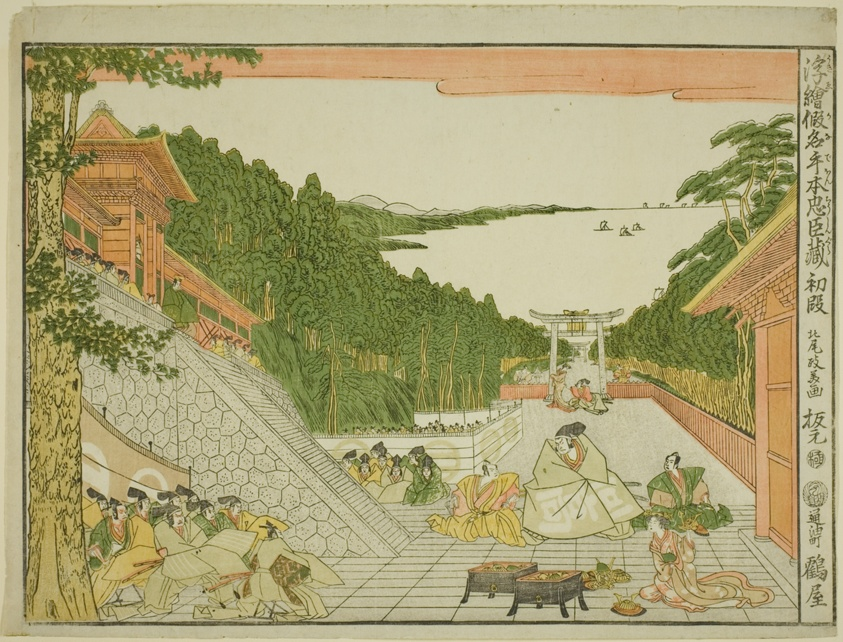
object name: Print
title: Act I (Shodan), from the series Perspective Pictures of the Storehouse of Loyal Retainers, a Primer (Uki-e Kanadahon Chushingura)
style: edo (japanese period)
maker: Kitao Masayoshi (Kuwagata Keisai) (Japanese, 1764–1824)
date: c.1791-94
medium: Woodblock print (nishiki-e); ink and color on paper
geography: Japan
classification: woodblock; print